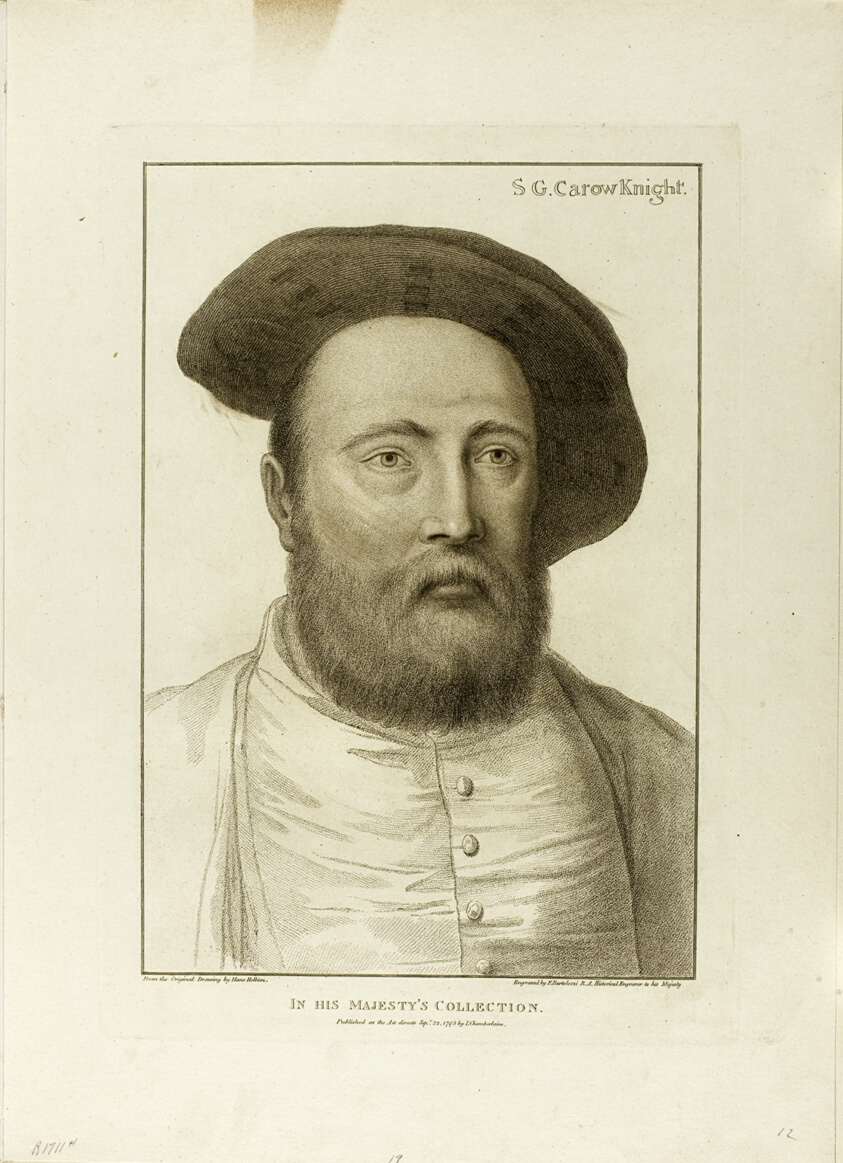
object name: Print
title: S.G. Carow, Knight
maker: Francesco Bartolozzi (Italian, 1727-1815); after Hans Holbein the younger (German, 1497-1543)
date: September 22, 1795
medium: Stipple engraving on ivory wove paper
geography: Italy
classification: engraving; print; prints and drawing